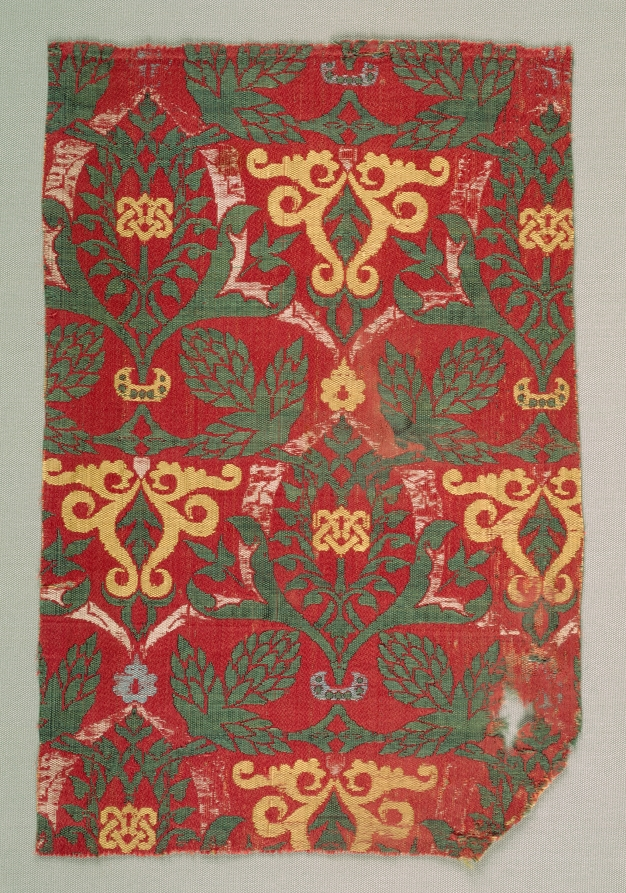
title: Fragment with curving vine and palmette leaves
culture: Spain, Granada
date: 1400s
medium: Silk: lampas weave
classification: Textile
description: The sophisticated combination of elements in this colorful fragment include large split palmette leaves in ivory silk framing yellow interlacing knots in a leafy surround. Prominent floral buds are arranged with dynamic effect in staggered rows. Foral motifs became increasingly prominent on textiles during the 1400s, supplanting geometric patterns.